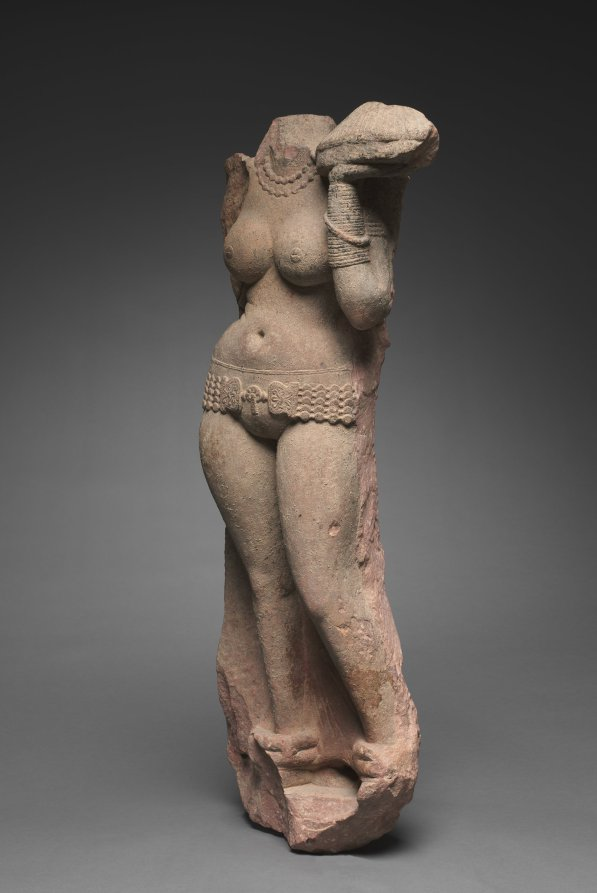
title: Female Devotee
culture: India, Mathura, Kushan period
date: c. early 100s CE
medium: sandstone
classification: Stone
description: This female devotee is depicted approaching the place of worship carrying a covered wicker tray that would have been filled with fresh flower garlands.The sense of dynamism and power in the stance, the masterful transformation of stone into the suppleness of youthful, voluptuous flesh barely interrupted by clothing, as well as touches of naturalism—seen in the slipping of the large bangle down the spiral cuff—are all stylistic characteristics of female figures made during the early 2nd century.